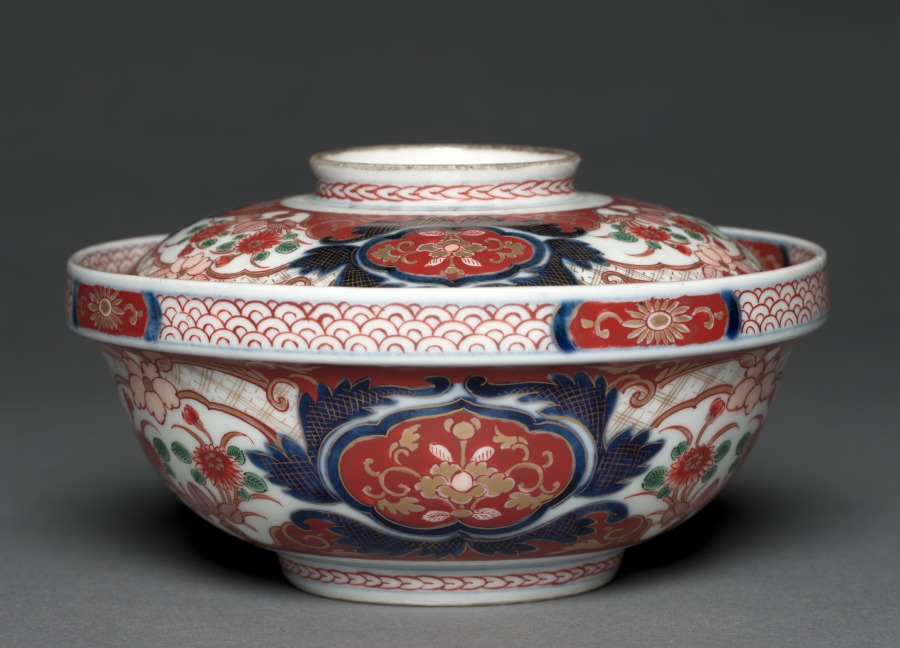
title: Covered Bowl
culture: Japan, Edo period (1615–1868)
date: early to mid-1800s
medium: white porcelain with underglaze blue, overglaze enamel and gold decoration (Hizen ware, Arita type)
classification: Ceramic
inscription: four characters in blue circle on base, translate as: "Wealth Long Spring."